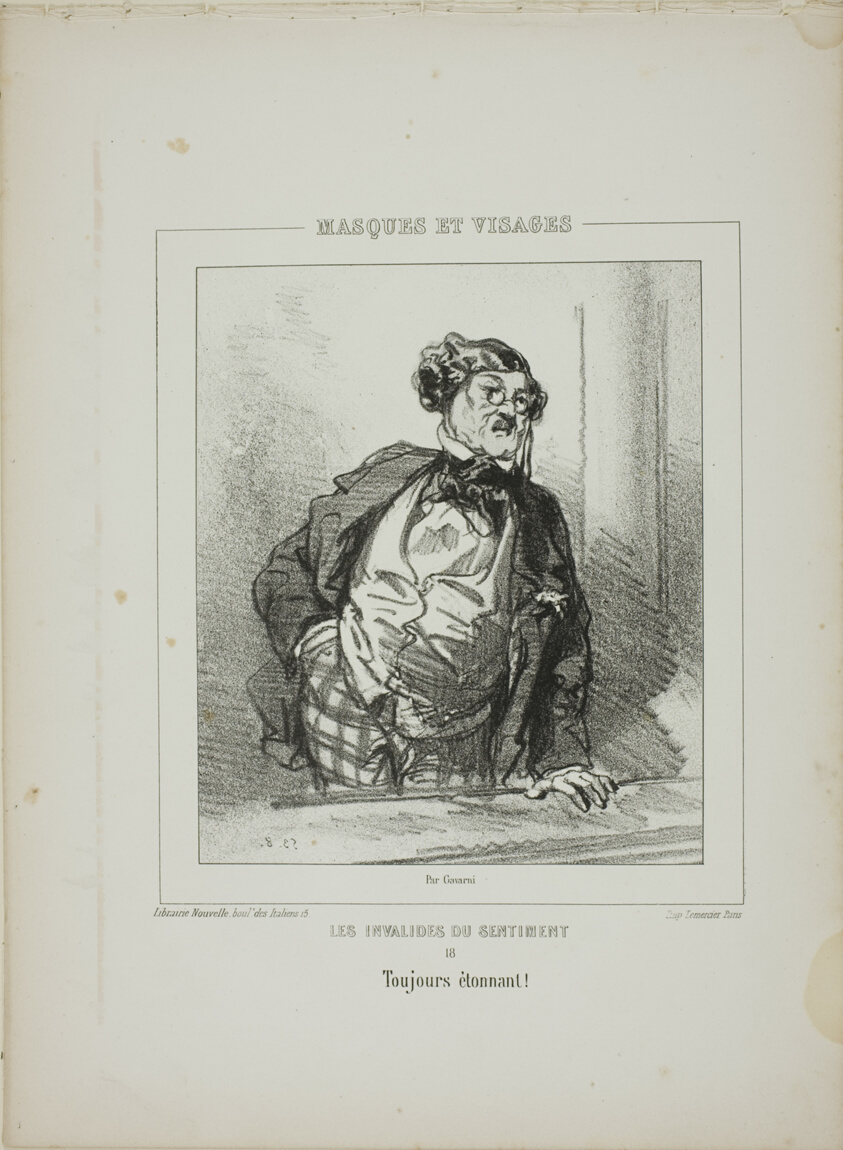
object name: Print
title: Les Invalides du Sentiment: Toujours étonnant!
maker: Paul Gavarni (French, 1804-1866)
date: 1853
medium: Lithograph in black on cream wove paper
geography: France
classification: lithograph; print; prints and drawing